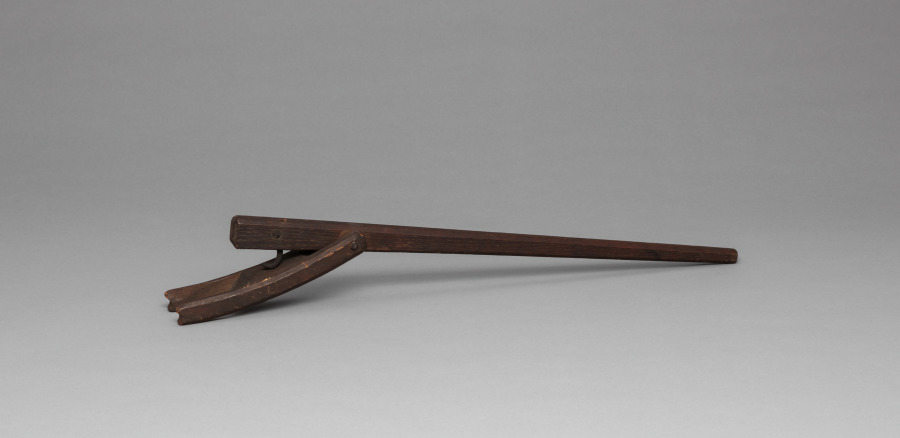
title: Lever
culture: England, 17th century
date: 1600s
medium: stained wood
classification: Arms and Armor